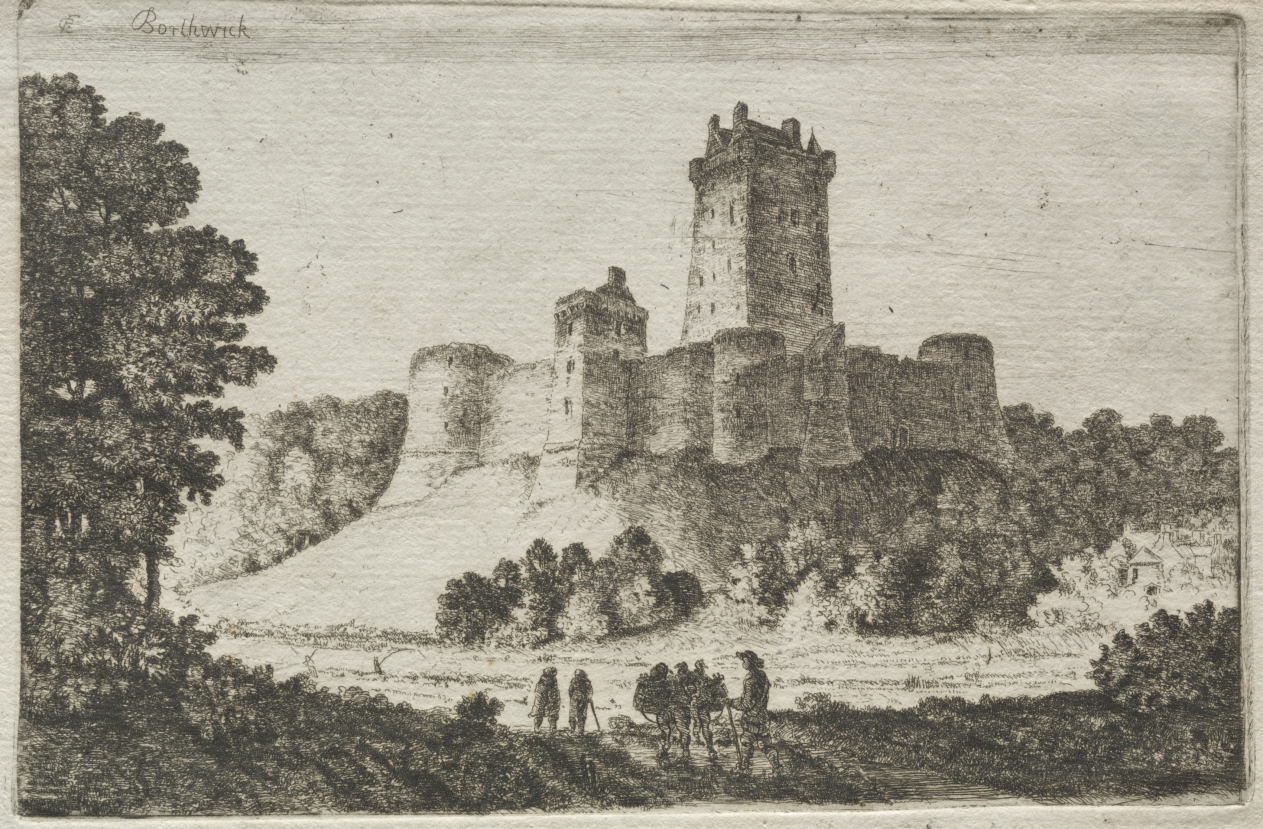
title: Borthwick Castle from the East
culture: England, 18th century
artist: John Clerk of Eldin (British, 1728–1812)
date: c. 1770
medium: etching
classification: Print